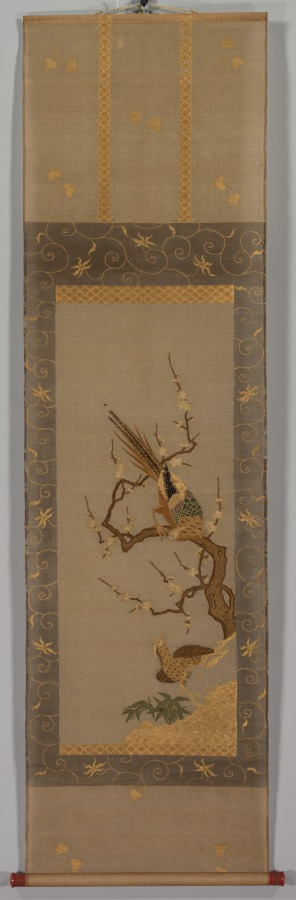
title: Birds in a Tree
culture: Japan, Edo period (1615–1868)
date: c. 1700–1868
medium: hanging scroll; silk gauze brocaded with gold and silk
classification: Textile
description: This scene of two Chinese pheasants with a flowering plum tree (a sign of the arrival of spring in Japan) is not painted. All the lines and surfaces are created by colored threads carefully stitched together into the silk. Consequently, the surface appears quite different from paintings on paper.